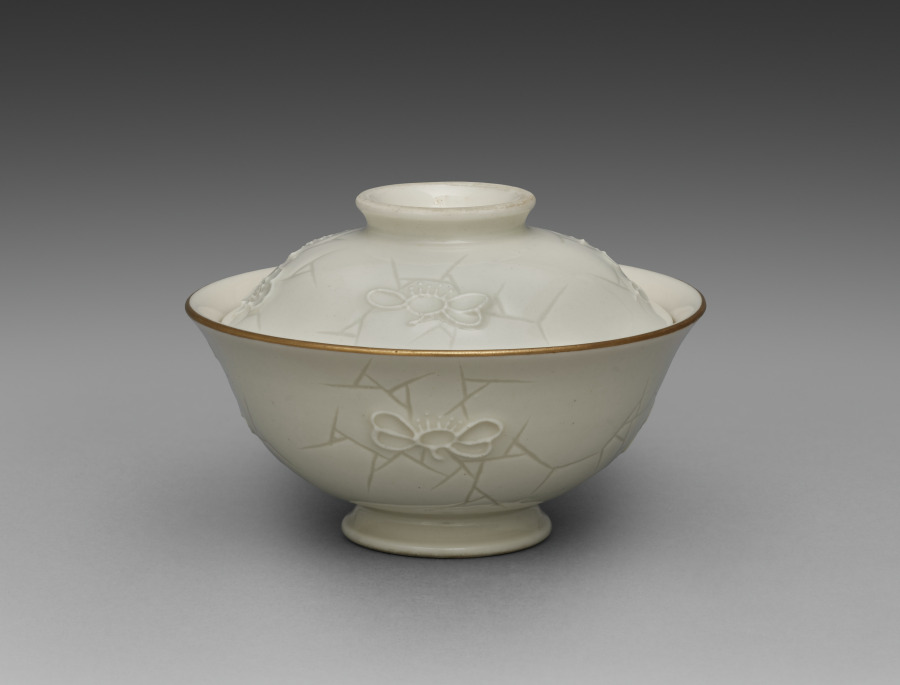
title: Covered Bowl from Dining Set with Plum Blossoms and Cracked-Ice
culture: Japan, Meiji period (1868–1912)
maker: Seifū Yohei II (Japanese, 1844–1878)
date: c. 1875–78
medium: Porcelain with molded designs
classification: Ceramic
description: Each item in this set has a delicate low-relief design of flowering plum branches over scattered, intersecting lines meant to resemble the cracked-ice surface of a frozen body of water and is signed on the base in gold pigment. While Yohei II produced many fine works in underglaze blue, like those produced by Kiyomizu Shichibei, he also made works in quite different styles later in his career, from the early 1870 s. In 1873, he was appointed purveyor to the Industrial Center of Kyoto Prefecture, a designation associated with Kyoto’s efforts to reach an international market through the port of Kobe; and from 1875 until his death, he was involved in national-level projects to present Japanese ceramics across the world. It was during this period that Yohei III was apprenticed to Yohei II, and it has been suggested that this set may in fact be an early example of Yohei III’s work, which he signed with his teacher’s name. Decorated with flowers resembling Japanese textile motifs, the set calls to mind the design of Yohei II’s pair of vases with plum blossoms in the Victoria and Albert Museum. Here, the elaborate trees created for a formal public exhibition setting have been translated into the approachable blossoms of the genteel domestic environment. While the designs are consistent across the pieces, each raised flower petal and pistil and each incised line in the ice was done by hand, so the cups, bowls, and dishes are similar yet unique. The bottoms of two boxes once identified the set’s owner, but the information has been deliberately obscured with black ink. However, inscriptions still visible appear to indicate two occasions, once at the end of July 1886 , and once again in June 1916 , when parts of the set were requested from Hokura in Niigata Prefecture. The location corresponds to a neighborhood in the present-day city of Jōetsu. The surname Tsuji 辻 also appears on a paper tag affixed to one of the box cloths. Future research may possibly reveal more about their provenance. A vase by Yohei III in a private collection combines the formal grandeur of the Yohei II vases in the Victoria and Albert Museum with the gentler design of this dining set, placing flowering plum trees against soft, scalloped-edge clouds resembling those in golden screens.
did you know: The dining wares have a creamy white coloration that the four boxes containing them identify as Korean in style.